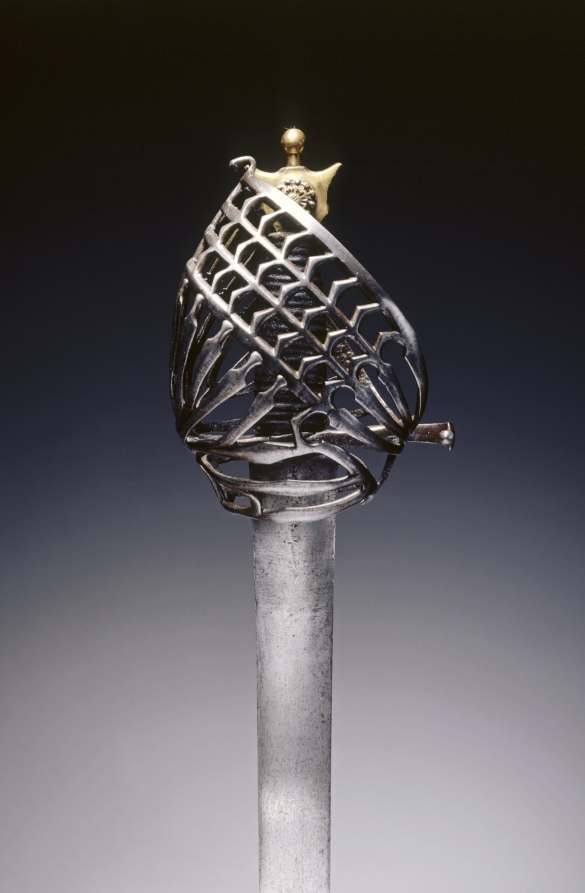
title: Schiavona Broadsword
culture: Italy, Venice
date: early 1700s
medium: steel, leather, wood, brass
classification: Arms and Armor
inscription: blade inscribed: POTZDAM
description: The schiavona-type broadsword features a complex barred guard that slopes forward. Its name derives from the Italian word for "Slavonic" and refers to the Slavonian corps who served as bodyguards to the Doge of Venice until the end of the Venetian Republic in 1797. Such swords were popular mainly with Venetians.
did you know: Usually used by the military, a broadsword has a straight, wide, two-edged blade a with basket-shaped guard that helps protect the hand.